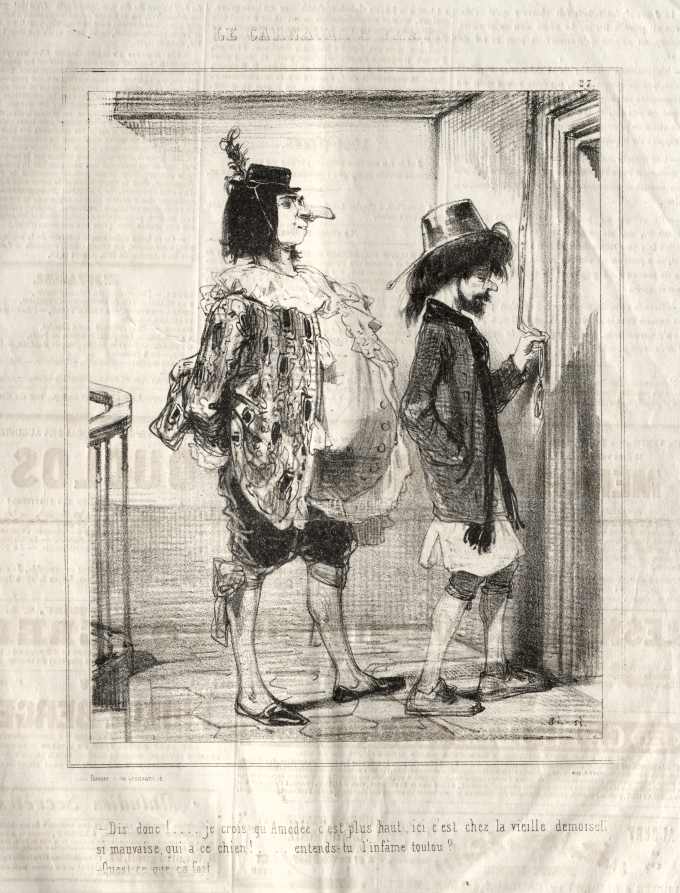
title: Carnaval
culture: France, 19th century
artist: Paul Gavarni (French, 1804–1866)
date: 1841–1843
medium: lithograph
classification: Print